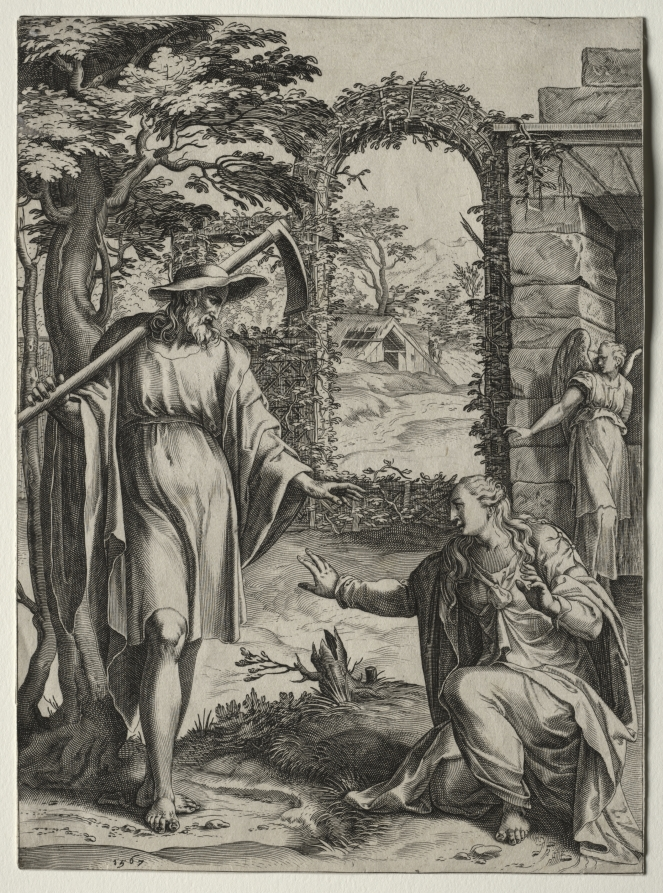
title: Christ Appearing to Mary Magdalen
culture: Netherlands, 16th century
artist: Cornelis Cort (Dutch, 1533–1578)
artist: after a design by Giulio Clovio (Italian, 1498–1578)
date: 1567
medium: engraving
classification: Print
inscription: lower left, in plate: 1567 ; VERSO, by Pierre Mariette, lower center, in brown ink: P. Mariette 1671 ; center, in graphite: 5/3 [circled] ; lower left, in graphite: 63 767/3[c?]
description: Called the Michelangelo of small works, Giulio Clovio was known for translating the monumental forms of Michelangelo into works on the smallest scale, such as illuminated manuscripts. This engraving (made after Clovio’s design) sets the bold, lean, and twisting bodies of Christ and Mary Magdalene against a garden scene more typical of manuscript illuminations. The print was engraved and published in Antwerp, a center for print and book publishing in the second half of the 1500s. The dissemination of this and other such works spread Michelangelo’s figural style throughout Europe.